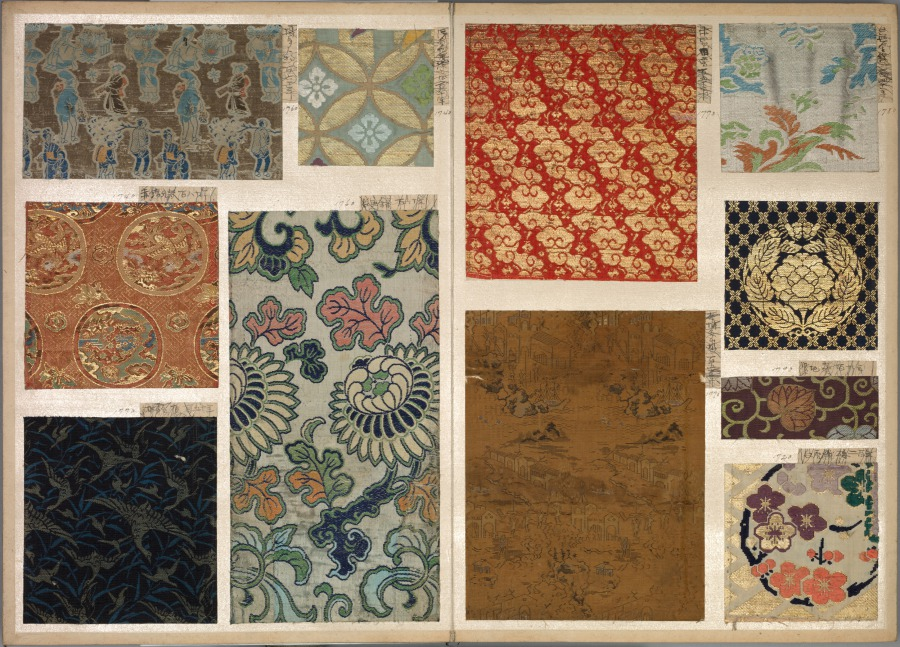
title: Album of Textile Samples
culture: Japan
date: 1790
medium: silk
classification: Textile